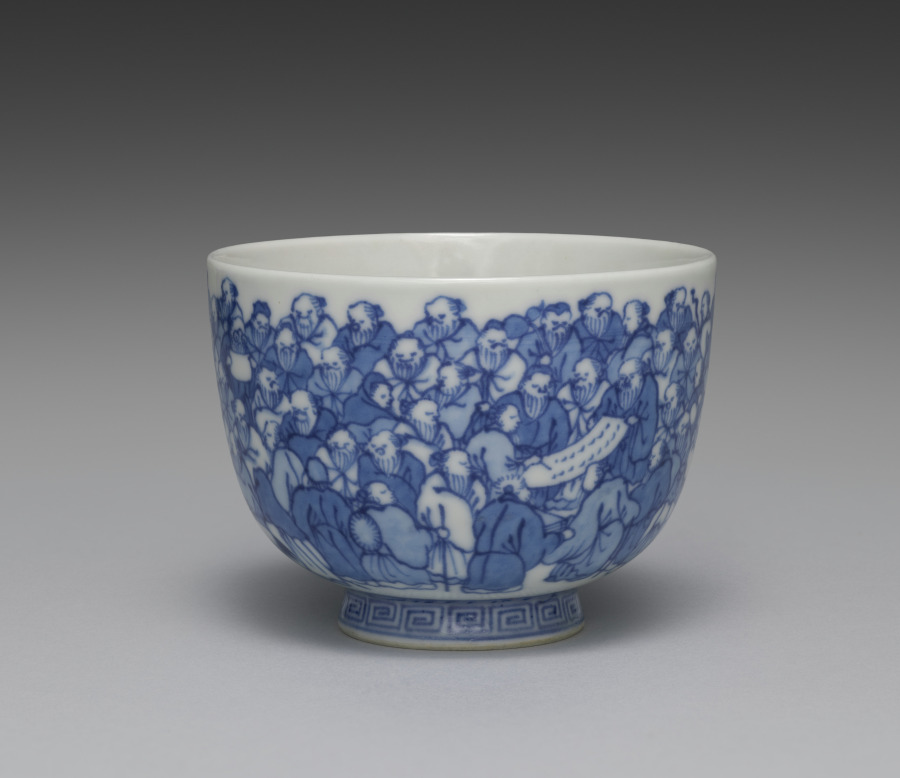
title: Teacup from Teacups with a Hundred Sages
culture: Japan, Meiji period (1868–1912)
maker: Seifū Yohei III (Japanese, 1851–1914)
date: 1893–1914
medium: One from a set of five teacups; porcelain with underglaze blue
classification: Ceramic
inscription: 清風造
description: Each of these five teacups has a painting of identical design in underglaze blue, but as the tiny figures are drawn entirely by hand, each cup has its own personality. The theme of the sencha cups is an assembly of sages or immortals, literally “a hundred venerable [people]” (hyakurō). The myriad figures crowd the scene in groups. The god of longevity, with his tall forehead, sits with his cranes, having flown in from Mt. Penglai on the Isle of the Immortals. Seven long-bearded sages sit around a stone table, chatting and drinking; one is seated on an enormous gourd. Of course, there is a stack of books on the table, and elsewhere, scrolls are being written upon or read—in one case held very close by a sage who is wearing glasses. The design was enormously popular in ceramics made for those engaged in literati culture.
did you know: Seifū Yohei III (1851–1914) produced many works for tea gatherings where people drank Chinese-style leaf-tea (sencha).